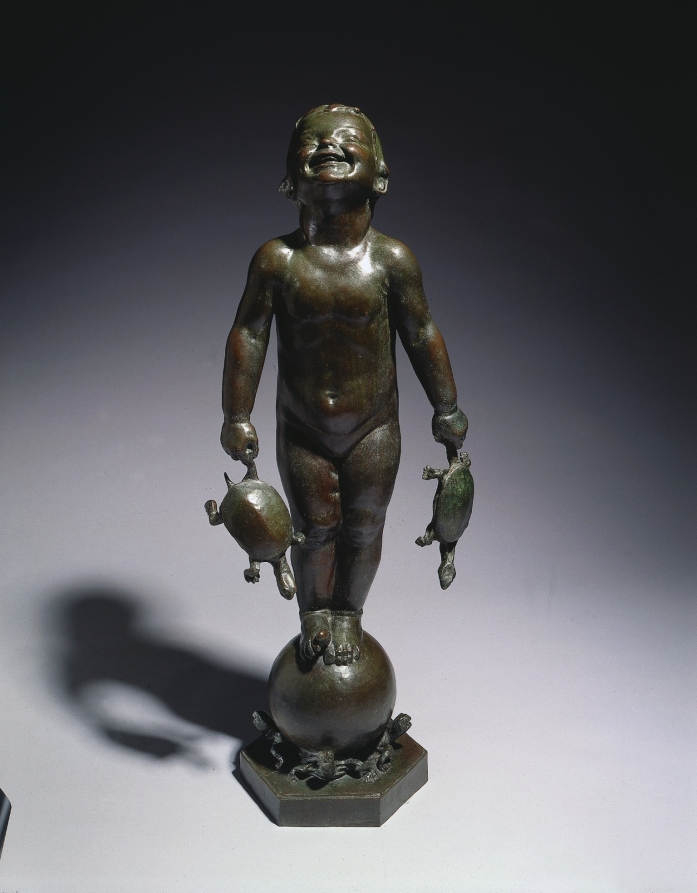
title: Turtle Baby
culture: America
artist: Edith Barretto Stevens Parsons (American, 1878–1956)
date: c. 1910–16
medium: bronze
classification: Sculpture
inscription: Signed on base: E. BARRETTO PARSONS COPYRIGHT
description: Parsons achieved renown through her garden sculptures of young children accompanied by animals, which one commentator praised for capturing “the happiness of just being alive.” In Turtle Baby, her most famous composition, the figure of the girl was modeled after her daughter. Conceived as a fountain, the sculpture has internal water conduits exiting the mouths of the four turtles circling its base.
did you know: Parsons created similar sculptures featuring young girls and boys with ducks, frogs, and fish.